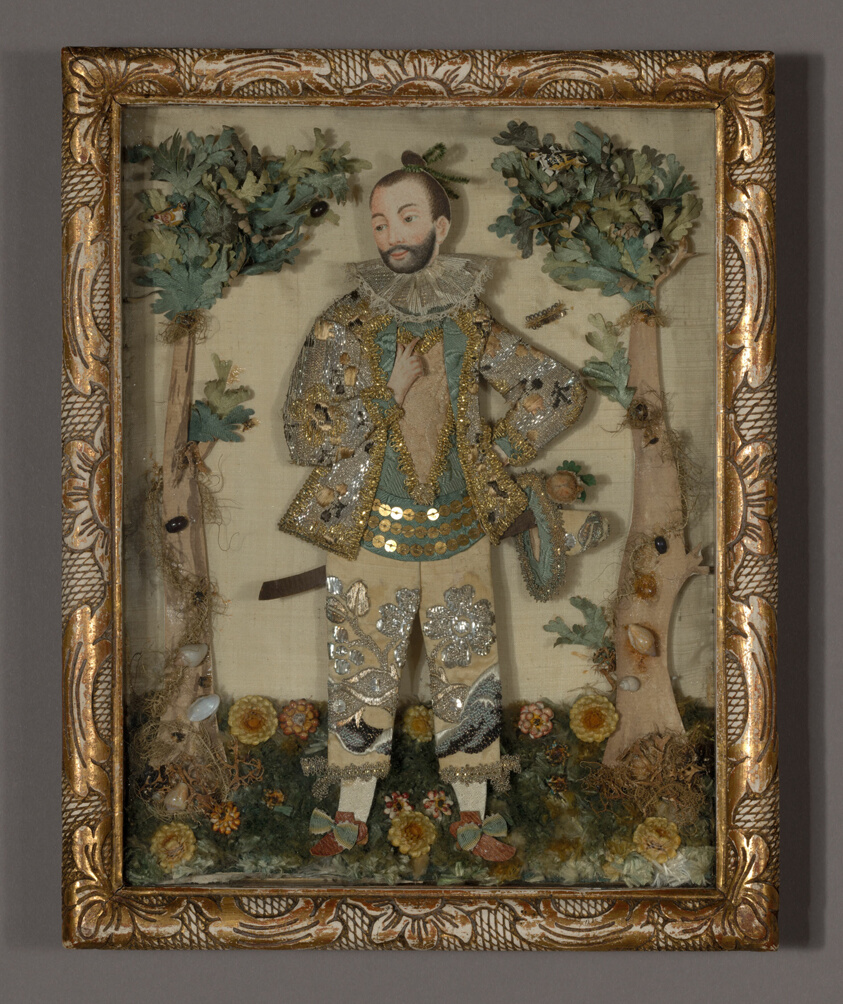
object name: Textile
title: Needlepoint Picture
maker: France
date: 19th century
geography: France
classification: textile; needlework (visual works)